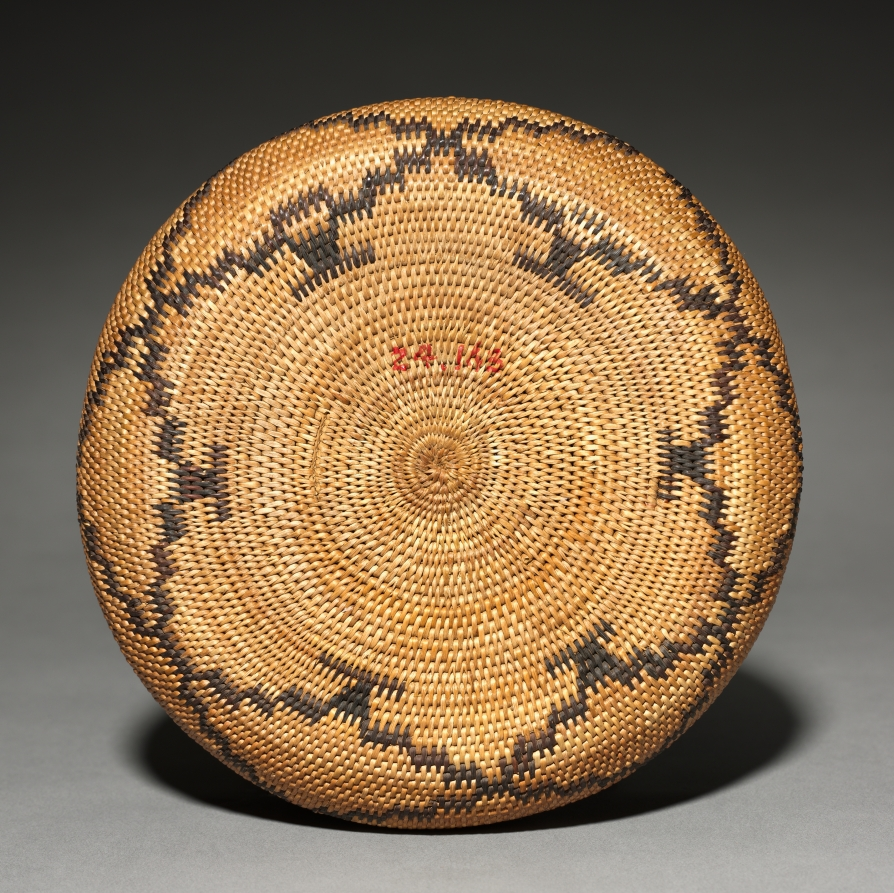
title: Trinket Bowl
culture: California, Pomo, Late 19th- Early 20th century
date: c. 1895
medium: Bulrush, Sedge, with beads; coiled (1 rod)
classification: Basketry